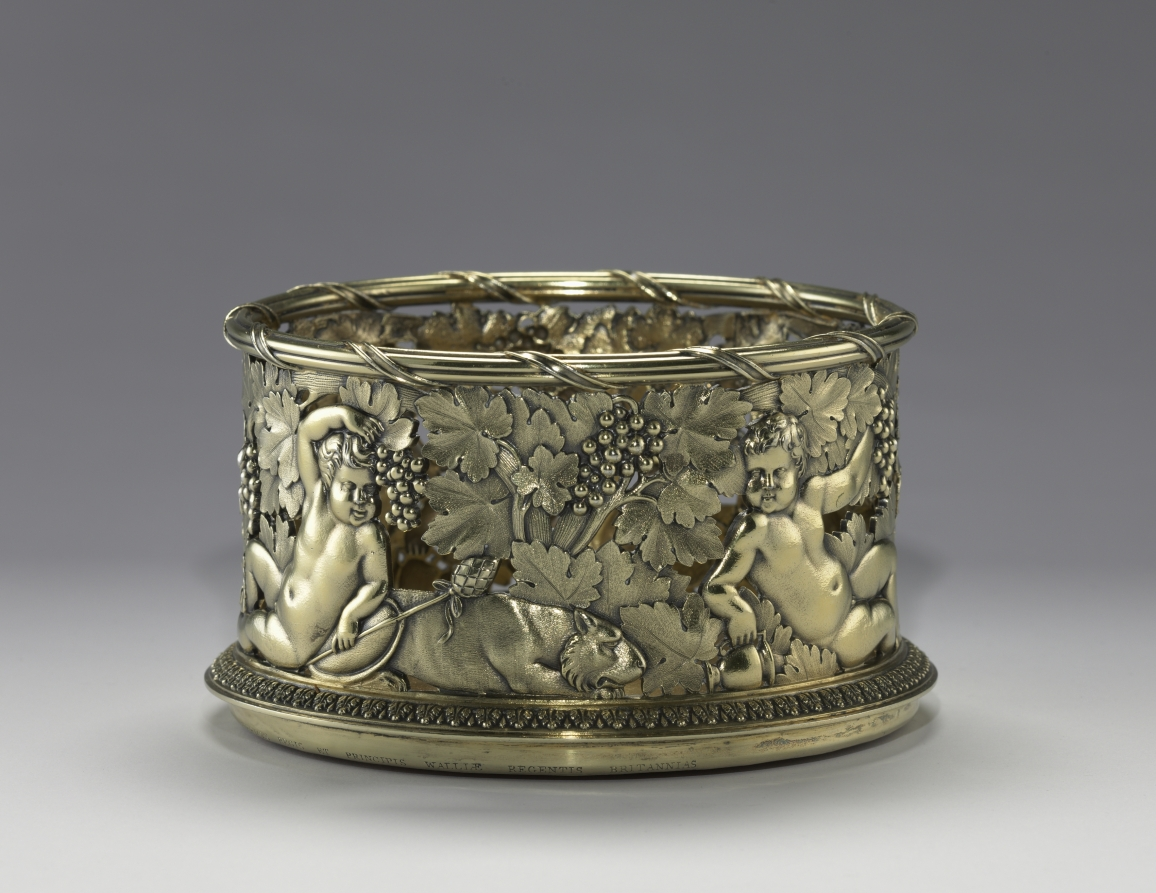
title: Decanter Stand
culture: England, London, 19th century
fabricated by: Paul Storr (British, 1771–1844)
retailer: Rundell, Bridge and Rundell (British, 1797–1834)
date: 1814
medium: silver gilt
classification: Silver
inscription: Engraved on rim of base: "RUNDELL BRIDGE ET RUNDELL AURIFICES REGIS ET PRINCIPIS WALLIAE REGENTIS BRITANNIAS."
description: Decanter stands served as coasters for glass wine bottles in order to protect the extremely expensive and fragile linen tablecloths they sat upon. This example contains depictions of large grape vines and youthful figures that evoke the Roman god of wine, Bacchus (or Dionysus in Greek mythology). One of the young boys grasps an empty drinking vessel while the other leans against a panther, the frequent companion of Bacchus.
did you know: Bacchanal motifs of grapes and consumption echo this object’s function as a stand for a wine decanter.